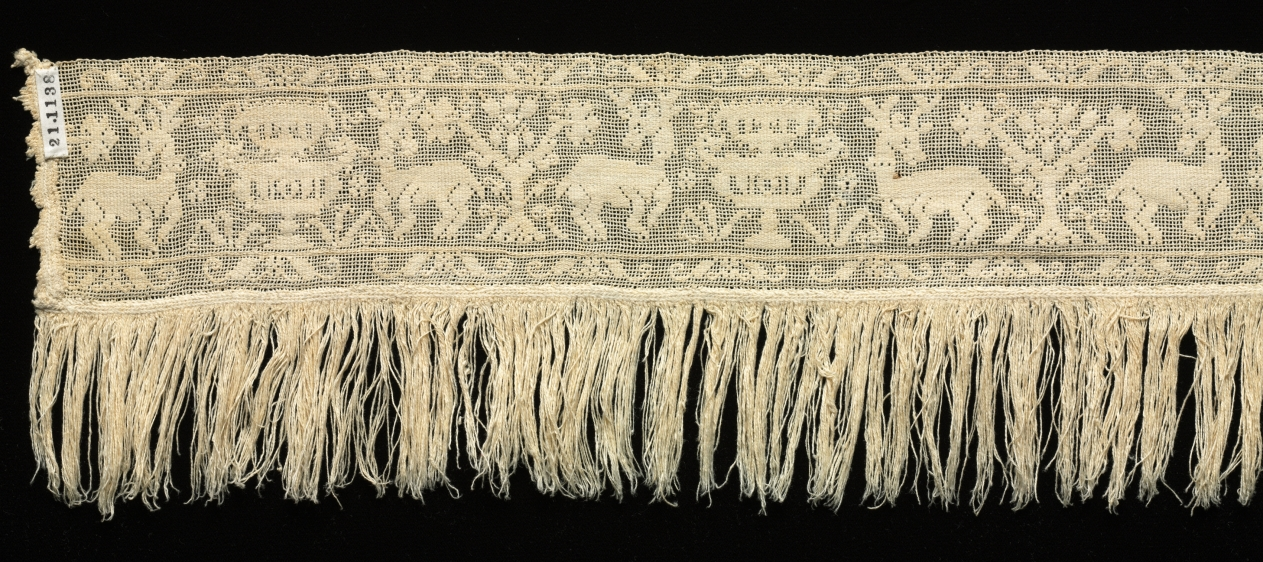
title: Border with Stags, Fountains, and Trees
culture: Italy, Sicily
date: 1500s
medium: Bleached linen (est.): needle lace, burato (twined ground and darned in one direction) and applied fringe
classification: Lace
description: Prancing stags, represented with their heads turned backward, flank an ornate fountain. The fountain motif could allude to rejuvenation and immortality.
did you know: Plant motifs, such as the blooming bushes found here, flanked by birds, were popular for their associations with well-being or blessing.